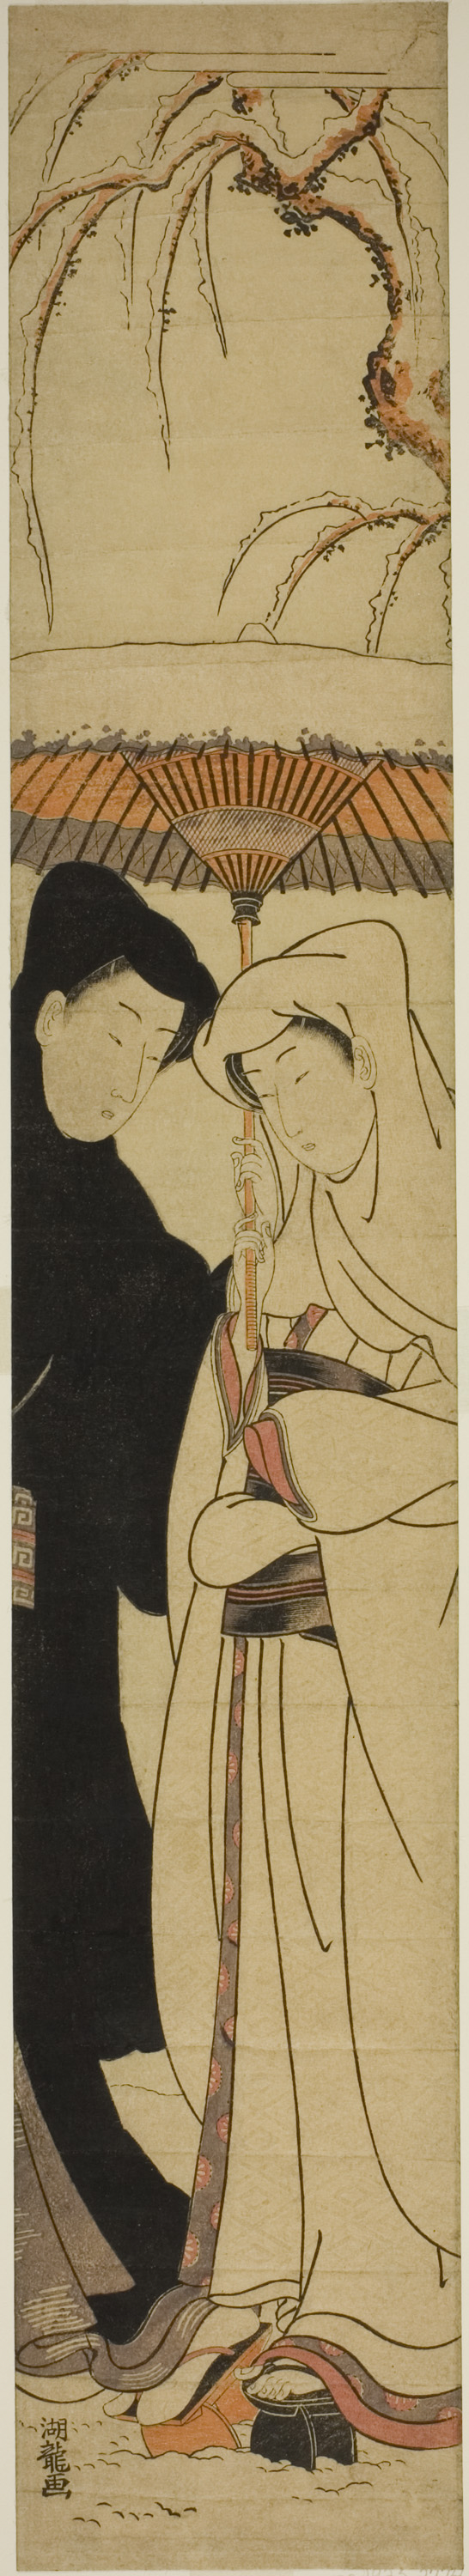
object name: Print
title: Couple Sharing an Umbrella Under the Snow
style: Japanese (culture or style)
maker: Isoda Koryusai (Japanese, 1735-1790)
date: c. 1771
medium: Color woodblock print; hashira-e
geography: Japan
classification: woodblock print; print; asian art